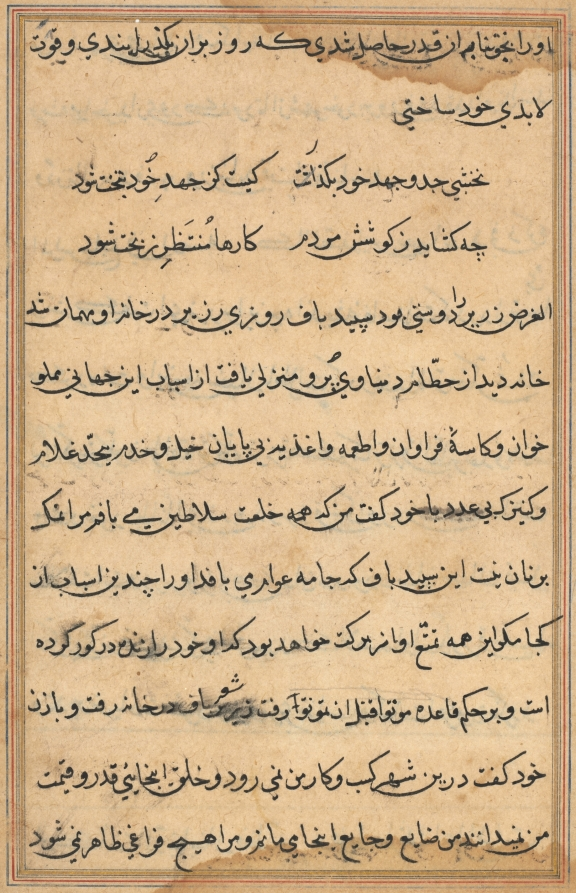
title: Page from Tales of a Parrot (Tuti-nama): text page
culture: Mughal India, court of Akbar (reigned 1556–1605)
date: c. 1560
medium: gum tempera, ink, and gold on paper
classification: Painting